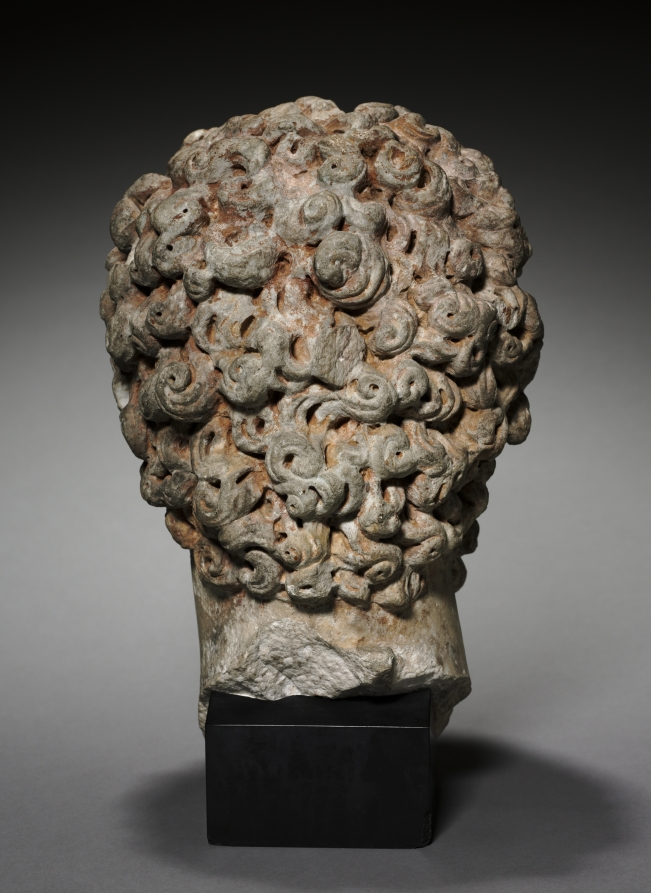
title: Portrait Head of a Noble or Official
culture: Italy, Roman, Antonine period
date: 175–200 CE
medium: marble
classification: Sculpture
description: A nobleman or government official is likely depicted in this portrait of a curly-haired man with a full beard. These features, together with drilled pupils and irises on the eyes, typically do not appear in Roman sculpture prior to the reign of Hadrian (AD 117–38), an admirer of Greek culture. Deeply carved beards and curls remain popular in portraiture throughout (and beyond) the Antonine period (AD 138–92), when this sculpture was probably made.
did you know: When acquired, this portrait was thought to depict Lucius Verus, co-emperor with Marcus Aurelius (reigned AD 161–69).